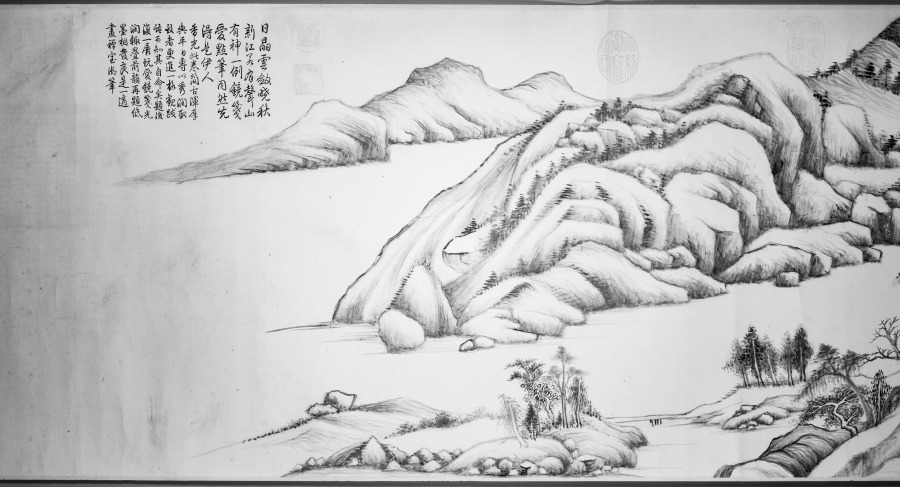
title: River and Mountains on a Clear Autumn Day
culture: China, Ming dynasty (1368–1644)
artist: Dong Qichang (Chinese, 1555–1636)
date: c. 1624–27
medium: Handscroll; ink on Korean paper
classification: Painting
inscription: 黃子久江山秋霽似此，當恨古人不見我也。思翁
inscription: 董文敏每遇高麗鏡面箋，書畫尤為入神。此卷改表紙用之，字跡隱然，兼有朝鮮之印。至於筆法圓秀，真接倪黃。豈文沈所可同日而語也。 康熙庚午中秋後一日，天氣澄爽，重裝初畢，跋於瓶廬。抱瓮翁高士奇。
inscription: Second inscription by Gao Shiqi 高士奇 (1645–1704): On the twenty-third day of the ninth month, the jiaxu year of the Kangxi era [1694], I packed my bags to head north. When my boat passed Wuchang [Suzhou], Mr. Mantang [Song Luo] brought wine to bid me farewell so that we could share our thoughts on our separation in the last few years. I showed him the paintings and calligraphy which I collected and asked his opinions. Since Mr. Mantang does not own any handscrolls by Wenmin [Dong Qichang], I leave this one for him in commemoration of our parting; thus the painting will have a worthy owner and our meeting will become a beautiful story in the future. It is the fourth day after the beginning of winter, with the sky clear and sober. Trees under frost have turned red and yellow, seemingly echoing the brush and ink in the painting. I also ask Mr. Mantang to inscribe a poem to commemorate our meeting so that it will survive forever.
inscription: 1 colophon and 4 seals of Song Luo 宋犖 (1634–1713): Who is the foremost art connoisseur of our dynasty?/ Tangcun [Liang Qingbiao, 1620–1691] is dead, so the title passes to Jiangcun [Gao Shiqi]./ Leaving office, you retired for five years in the Lake region./ Fondling handscrolls and hanging scrolls from morning to evening./ You sent me your collection catalogue Xiao Xia Lu last year;/ It is indeed the true equal of [Zhou Mi's] Yun Yan Guo Yan./ This year you returned to the capital by imperial order;/ Your boat with calligraphy and paintings anchored at the river bank in Suzhou./ When we met each other you did not waste any time for conversation by poured out immediately/ From your "coral net" extraordinary treasures./ You produced incomparable scrolls, with gold-inscribed labels and jade rollers,/ Pouring out from bags and trunks, they were spread in disarray./ Without a word, I rolled and unrolled until my fingers were numbed,/ We sat straight, facing each other quietly, and never felt tired./ For three days we forgot about sleeping and food./ And at times we shouted our joy out loud, forgetting who is host or guest./ Your Dwelling in the Fuchun Mountains and the Yuansheng manuscript/ These peerless works I myself examined with delight./ As an added pleasure to the farewell dinner under the Maple Bridge,/ You allowed me to hold again this handscroll by Dong Qichang--/ The Misty River and Piled Peaks [by Zhao Mengfu] and this Clear Autumn Day are two extraordinary masterpieces./ In showing such life and spirit with "qi yun." the artists were truly "men of heaven."/ The Clear Autumn Day is not even three feet long,/ Painted on tributary Korean paper, it shines like silver./ Every building up and every turn of the mountains imitates nature,/ Every tree and every rock is removed from the commonplace./ From the beginning, the theory of poetry is the theory of painting,/ Like the lotus and the morning sunshine, they complement and refresh each other./ The artist's inscription regrets that "the Old Masters cannot see my scroll."/ Huang Gongwang would have agreed in his grave./ The vermilion of the seals glitter and dazzles the eyes,/ These added accessories are as valuable as jade./ You are very kind to give it to me,/ The feelings expressed in your inscription are so sincere./ Wanting to refuse, but unable, I accept it to respect your wish,/ And taking off my gown and cap I wrapped it with care./ You asked me to write a long poem in commemoration of this beautiful occasion,/ I am too ashamed that my effort in response is so poor and inadequate./ Returning home, I unrolled it under candlelight, trying to write the colophon,/ The light of the waning moon shines at the foot of the mossy wall./ Earnestly humming and brows knit in deep thought, I try to compose;/ The verses are not outstanding, but the facts are real./ With this poem recorded at the end of the scroll, I mail it to you for approval,/ This poem and this painting shall outlast a thousand springs. (Translation by LYSL/HK/WKH)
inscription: 1 colophon and 2 seals of Shao Changheng 邵長蘅 (1637–1704); 2 inscriptions and 14 seals of the Qianlong 乾隆 emperor (r. 1736–95); 1 seal of the Jiaqing 嘉慶 emperor (r. 1796–1820); 3 seals of the Xuantong 宣統 emperor (r. 1908–11); 1 seal unidentified.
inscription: [印] 朝鮮國王之印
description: Dong Qichang had a tremendous impact on the artistic practices and historiography of later generations; his works and writings shaped literati aesthetics. Here, Dong places an abstract landscape composition diagonally across the picture plane, configured to recall earlier masters and simultaneously express his own personal style. Dong’s inscription claims, Huang Gongwang’s Autumn Day, looks like this. I truly regret the master has not seen my work. In fact, Dong Qichang may have had Dong Yuan’s Xiao and Xiang Rivers in mind, a work he owned and considered a key work in Chinese art history.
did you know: The painting has an imprint of a Korean seal that reads "Seal of the king of Joseon."